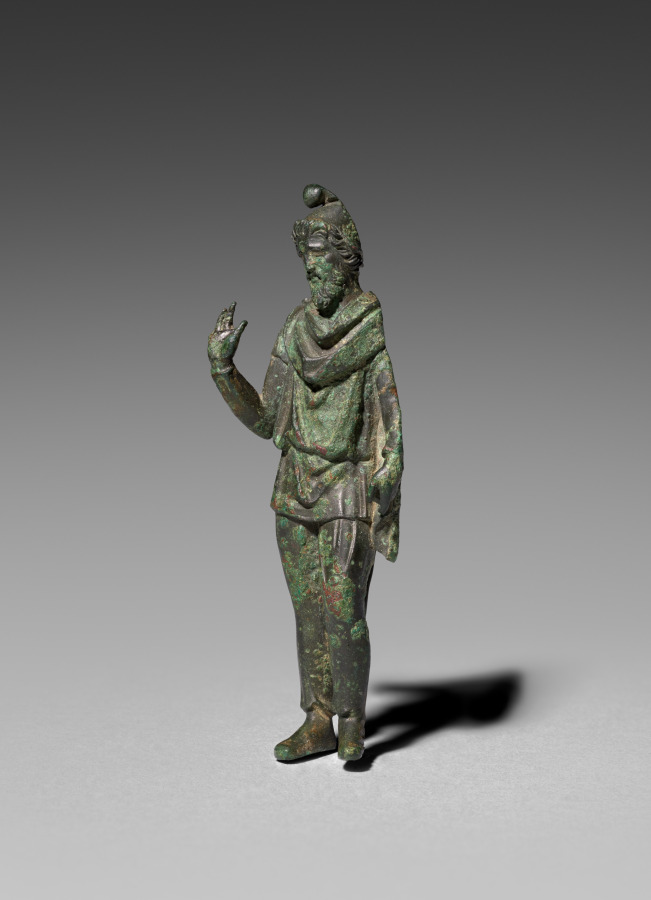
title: Barbarian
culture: Italy, Rome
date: 1–100 CE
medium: bronze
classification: Sculpture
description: This bearded figure wears a tunic, trousers, and a soft conical hat with the apex bent over, called a Phrygian cap. He stands with his right hand raised (missing the index and little finger) and his left leg slightly bent. The figure originally held an implement in his lowered left hand, whose fingers curve around a shaft. The garments and cap identify him as a foreigner, likely a Dacian. Emperor Trajan (reigned AD 98–117) fought two military campaigns against Dacia (modern-day Romania), where he conquered and annexed the southern half of the region.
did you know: This figure may have decorated an ornate parade breastplate on a horse.